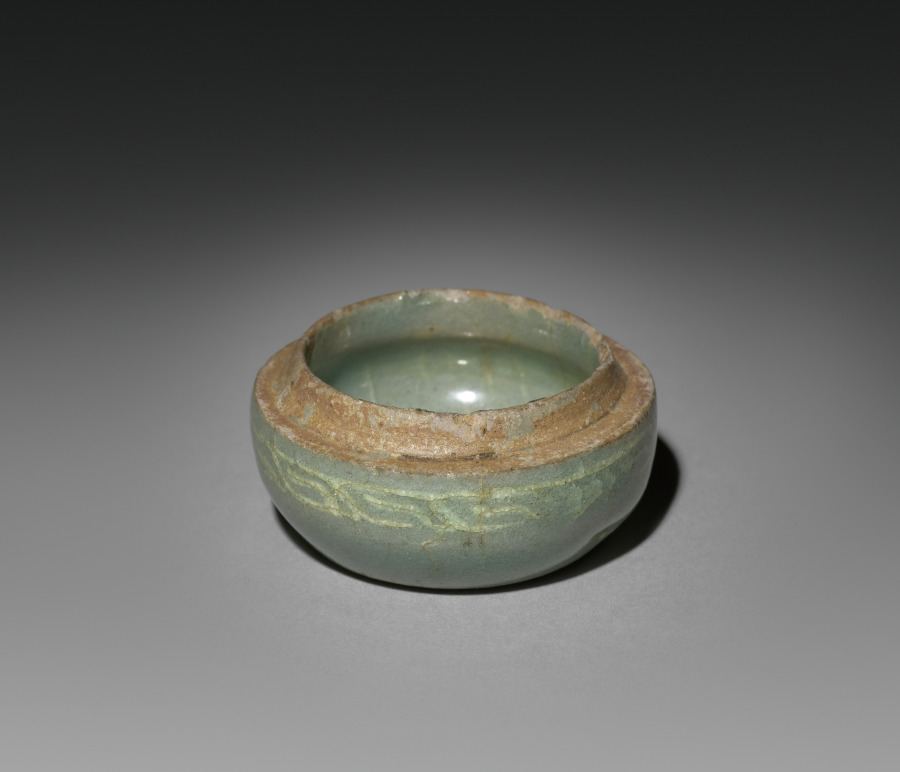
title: Box and Cover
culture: Korea, Goryeo dynasty (918–1392)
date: 918–1392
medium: celadon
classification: Ceramic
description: Celadons, spoons, seals, and bronze mirrors were the most common burial objects in tombs during the Goryeo period (918-1392). Once used to contain color powder, rouge and eyebrow gel for makeup, this small container was one of the standard goods that furnished elites' tombs. Goryeo-period women and men used the grain powder of rice or millet for whitening their skin, safflower extract for rouge, and plant ash or soot for eyebrow gel. Yet, natural-looking make-up seems to have been the most favorable one in Korea according to the travelogue by Xu Jing (1091-1153), the Chinese diplomat who visited Korea in 1123.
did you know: This ceramic container was used to store either incense or cosmetics.